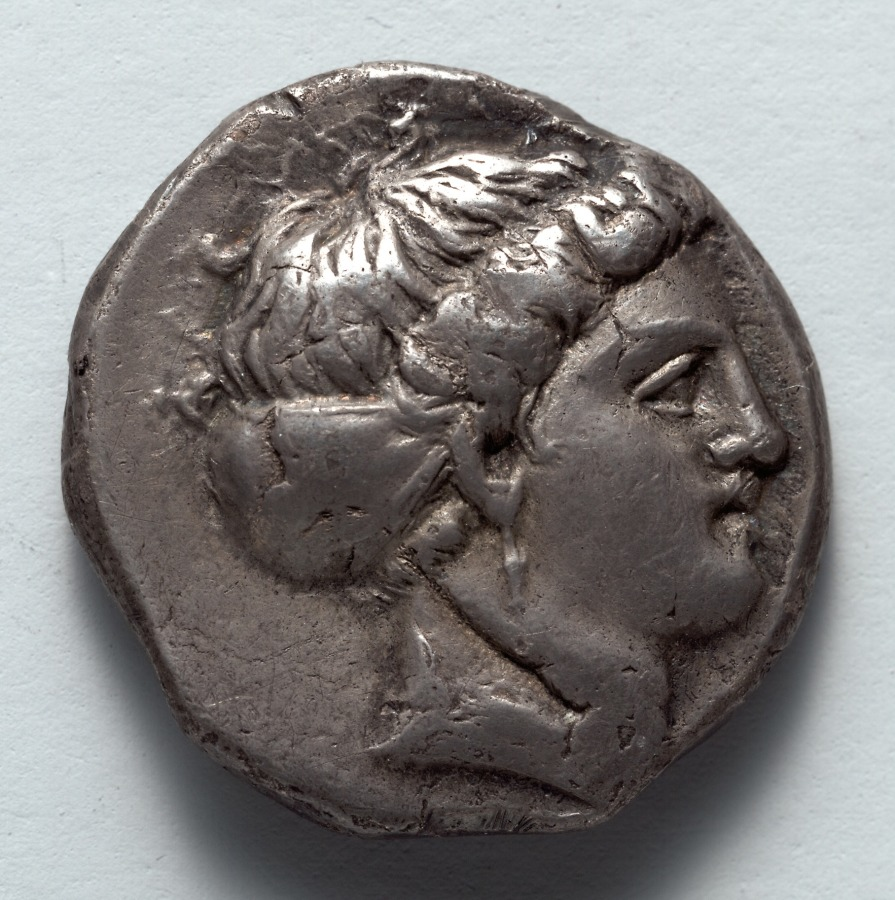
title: Stater: Head of Kore (obverse); Barley (reverse)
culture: Greek, minted at Metapontion (South Italy)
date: c. 340 BCE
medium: silver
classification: Coins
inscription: ΜΕΤΑ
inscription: ꓘ